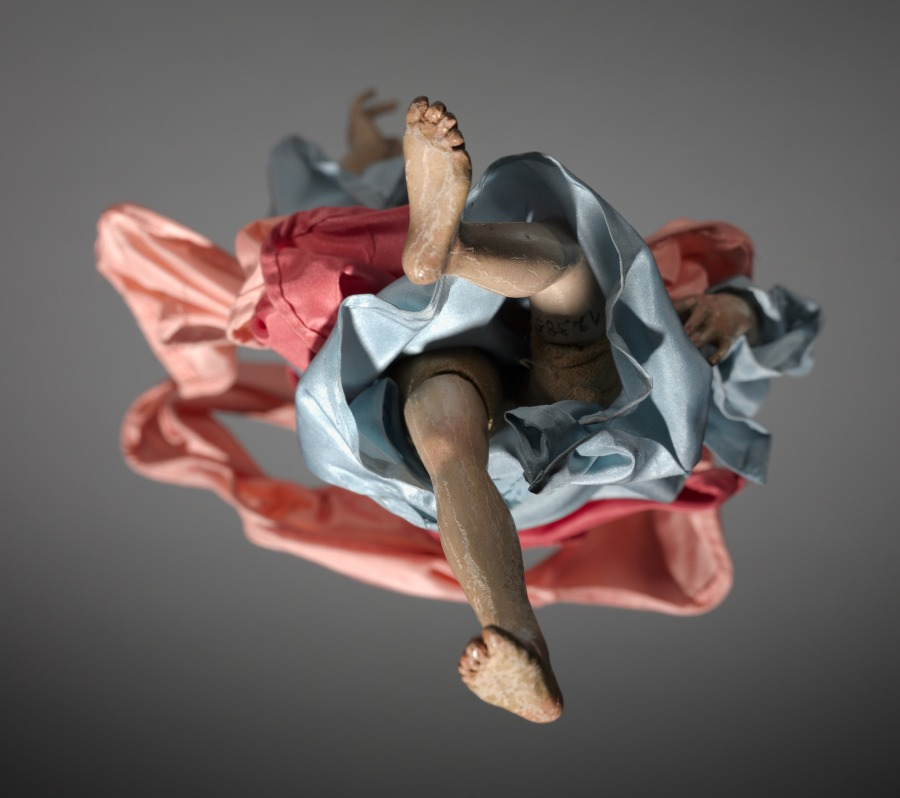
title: Figure from a Crèche: Angel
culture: Italy, Naples, late 18th-early 19th century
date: 1780–1830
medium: painted wood and terracotta with various textiles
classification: Sculpture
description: The practice of creating scenes of the Nativity for the home dates from the early 1700s in Italy, where people began to set up doll-like figures of about a foot or less in height. The custom was particularly popular in Naples around 1800, where crèche scenes (crèche means cradle, or crib) included many figures, whose heads and hands of painted terracotta, stuffed cloth bodies, and clothing adapted from contemporary local costumes gave them an amazingly realistic character. Representations of the birth of Jesus can be traced to the first few centuries of Christianity. Both living creatures and sculptural depictions of them were used from early times. By the late middle ages it was customary to create life-size figures of wood or stone, naturalistically painted, to represent the characters who participated in the events of Jesus's early life. These sculptures were then arranged in scenes illustrating one or both of the most important of these events, the Adoration of the Shepherds and the Adoration of the Magi-the three kings from the East who came to pay homage to the Christ child. Used in churches, these large figures were especially popular in Italy, Central Europe, Spain, and Portugal.